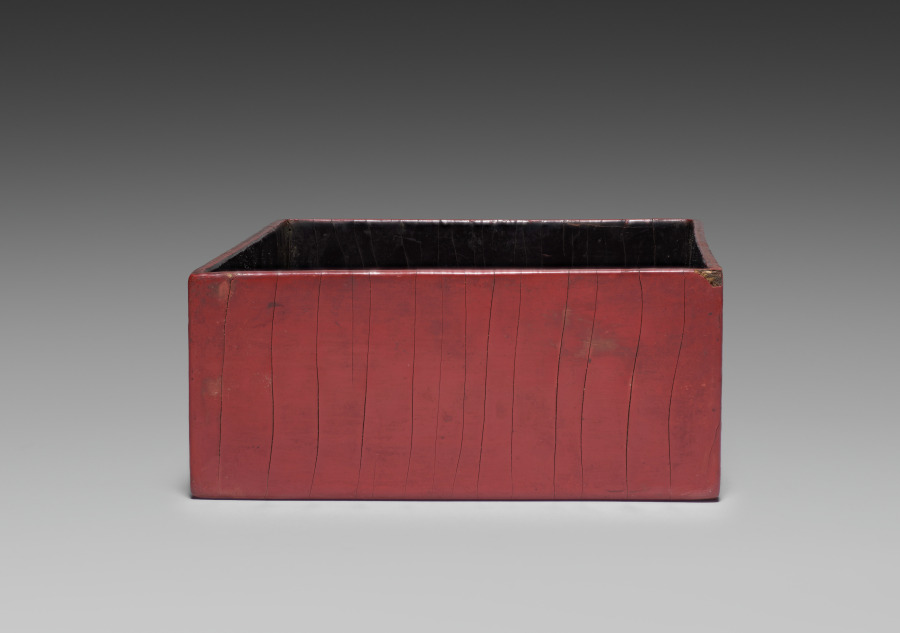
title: Drawer for a Tihong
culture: China, Ming dynasty (1368-1644), Wanli reign (1572-1620)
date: 1585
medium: carved cinnabar lacquer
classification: Lacquer